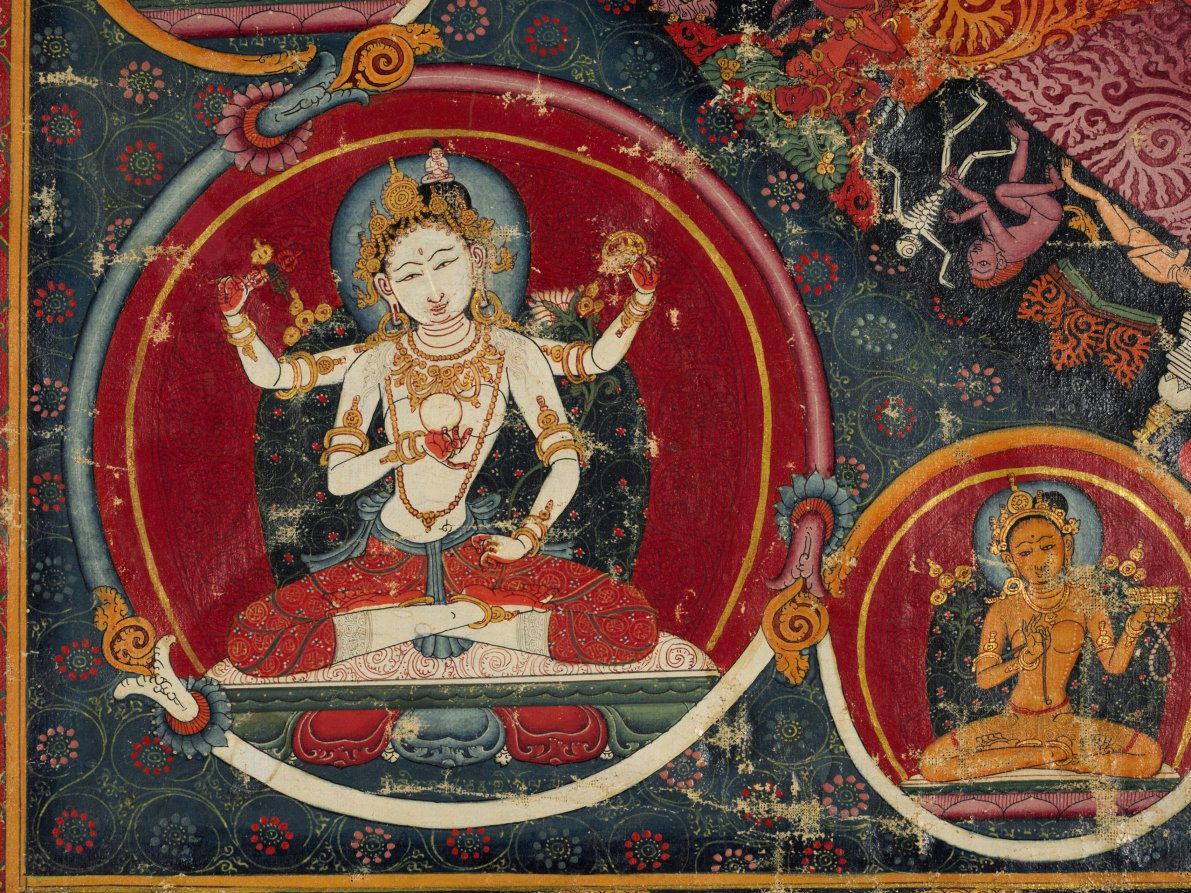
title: Twenty-three Deity Nairatma Mandala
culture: Central Tibet, Sakya-affiliated monastery, 14th century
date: c. 1375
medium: Gum tempera, ink, and gold on cloth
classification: Painting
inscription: The inscription along the bottom says: Twenty-three deity Nairatma Mandala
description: One of the main types of imagery in tantric Buddhist art is the mandala, a two-dimensional diagram of the realm of an enlightened being. This mandala depicts the palace of Nairatma, who dances in the center surrounded by her entourage. Using the painting as a guide, the tantric practitioner in meditation mentally projects the two-dimensional plan into three-dimensional space and enters into it. The outermost ring contains depictions of the cremation grounds, where corpses are being burned and consumed, as well as tantric yogis and masters who work there in order to understand the impermanence of the body, defeat their fear of death, and overcome irrational aversions to impure aspects of life. Virupa is depicted twice, always pointing to arrest the sun with his raised left hand. He sits among the row of lineage masters along the top edge, and is also depicted in the topmost segment of the ring of cremation grounds, being served a cup of liquor. Along with lineage masters at the top of this impressive painting, bodhisattvas and important masters are depicted in the spandrels, each identified by an inscription.